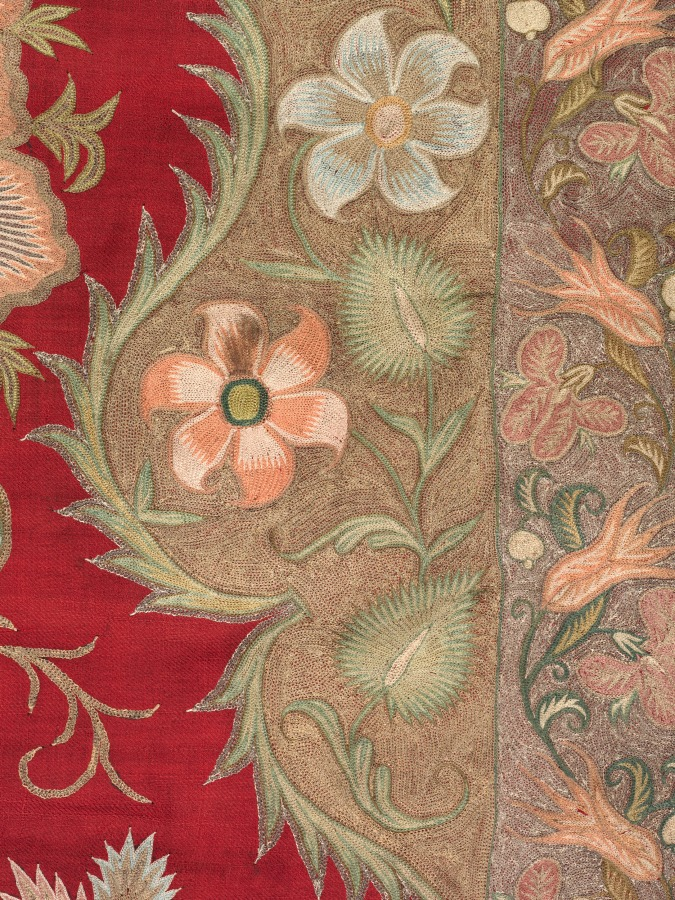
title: Embroidered Armenian liturgical curtain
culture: Turkey, Constantinople/Istanbul, Ottoman period (1299–1922)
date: 1763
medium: twill weave: wool; embroidery, chain stitch: silk, gilt- and silver-metal thread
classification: Textile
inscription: Inscription embroidered in erkatagir script with metal thread reads: "This curtain (varakouyr) is in memory of the people of Hassan Pasha Khan who gave it to the Monastery (vank) of Saint John the Baptist (Surp Garabed) on the Armenian date 10 May 1212 (1763 AD)."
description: This rare Ottoman embroidery features a floral bouquet that enriches the field under an elegant arch of gilt-metal thread. Flanked by vines of tulips and irises on a silver-metal-thread ground, vases of tulips and jonquils within cartouches adorn the main border and the well-turned corners, a sign of high quality. Dated 1763, the textile documents a mid-18th-century style and technique uncommon in Ottoman embroideries. The Armenian community commissioned this pattern for a liturgical curtain. Beneath the arch, Saint John the Baptist appears with a staff of victory, holding his own severed head in one arm and the Lamb of God in the other. The embroidered Armenian inscription reads: "This curtain is in memory of the people of Hassan Pasha Khan who gave it to the Monastery of Saint John the Baptist on the Armenian date 10 May 1212 [1763]."